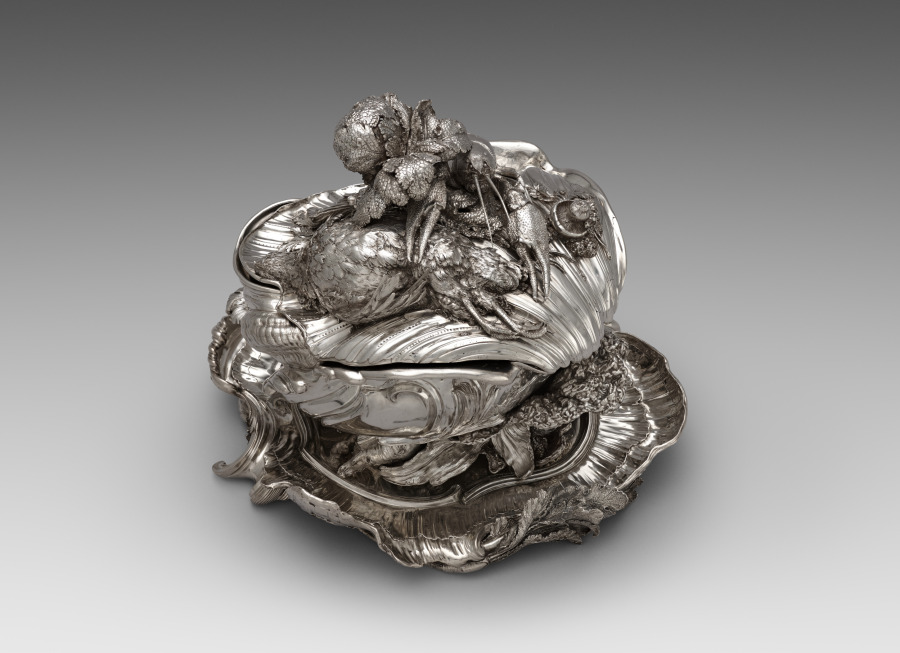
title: Covered Tureen on Stand (Pot-à-oille)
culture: France, Paris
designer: Juste-Aurèle Meissonnier (French, 1695–1750)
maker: Pierre-François Bonnestrenne (French)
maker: Henry Adnet (French, 1745)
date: 1735–38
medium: silver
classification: Silver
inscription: [Maker’s mark of Pierre−François Bonnestrenne, beneath platter; inside tureen (two marks)]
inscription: [Warden's mark for Paris, 1734−1735, beneath platter; inside tureen; inside cover]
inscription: [Charge mark of Hubert Louvet, Paris, 1732-1738, on platter border; beneath platter; beneath tureen; inside cover; inside tureen (two marks)]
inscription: [Discharge mark of Louis Robin mostly used for stamping small work, Paris 1738−1744, on platter border; beneath tureen]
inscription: [Warden's mark for Paris, 1736−1737, on platter border]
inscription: [Possibly British import mark, London, 1925, on platter border]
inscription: [Possibly mark of the British firm Charles & Richard Comyns, on platter border]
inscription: [Discharge of Louis Robin mostly used for stamping gold and silver between 1738 and 1744, beneath tureen; outside cover]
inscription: [Maker’s mark of Henry-Guillaume Adnet, inside cover]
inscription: [Two small undefined marks, inside cover]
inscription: [Under the surface of the platter the engraved signature]: “FAIT-PAR-I-A-MEISSONIER-ARCHITECTTE”; [and the weight] “673=5"; “No. [v] I 50 £ b76Sol”; [and the numbers] “A nº 1”; “A nº2”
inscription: [On tureen lip]: "MEISSONIER"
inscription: [On tureen lip]: “A nº 3”; “A nº2” [in order to place the tureen correctly on the stand]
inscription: [Numbers engraved on the stand, the tureen, and the cover to show how the piece should be assembled]: “A nº 1” [on the base of the tureen; beneath the cover; on the platter], “A nº 2” [on the platter], “A nº 3” [on the exterior rim of the tureen], “A nº4”; “A nº 5” [outside the cover], “A nº 7” [on the border of the platter]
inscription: [Two warden's marks for Paris, 1735-1736, beneath tureen]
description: This tureen exemplifies the French Rococo style, an artistic movement celebrating naturalistic forms that developed in Paris during the early 1700s. In contrast to classical, controlled symmetry, Rococo forms morph, twist, and spill into the space around them. Meissonnier embellished this tureen in a picturesque arrangement of vegetables and creatures, transforming a utilitarian object into a decadent display of wealth and abundance. This masterpiece comes from a set of two tureens commissioned by the English Duke of Kingston during an extended stay in Paris in the 1730s.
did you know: The langoustine, pigeon, and vegetables were cast using real examples giving the silver copies lifelike detail and appearance.